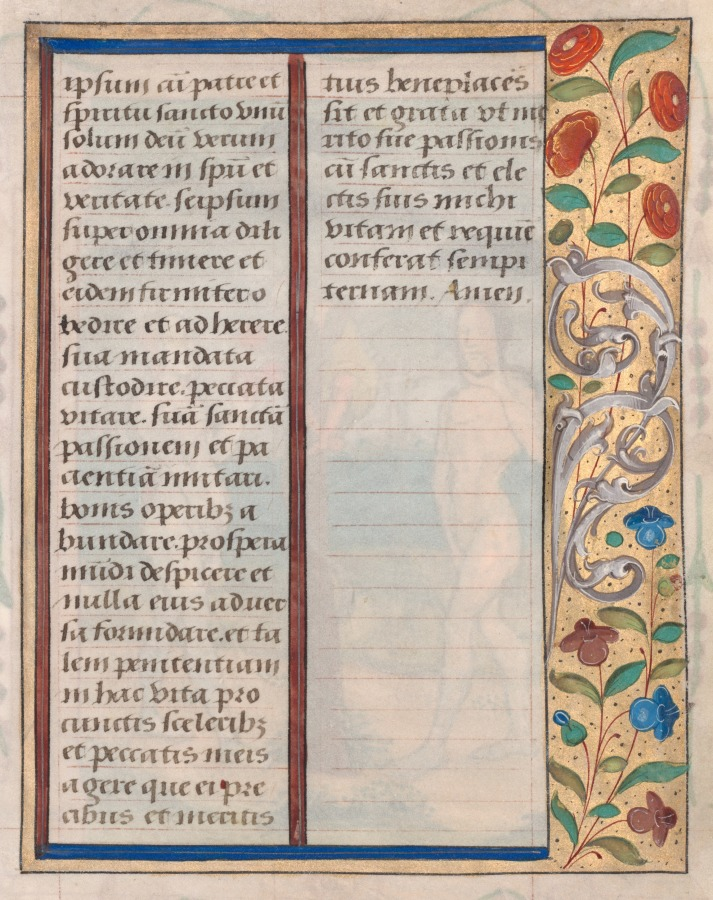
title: Leaf from a Book of Hours: Text with Illustrated Border (verso)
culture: France, Rouen, 16th century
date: c. 1510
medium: ink, tempera and liquid gold on vellum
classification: Manuscript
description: This leaf came from a highly customized and lavish book of hours made in Rouen, a major center for book production. Intended for a female patron, the original book, to which the museum owns three leaves, contained numerous illuminations and marginalia. The book was whole until the 1980s, when it was dismembered and the leaves sold separately. Other leaves from the same book are now in the Walters Art Museum in Baltimore, Maryland, and the Bodleian Library in Oxford, England. This leaf precedes the opening of the Hours of the Virgin and the traditional first scene of the Annunciation.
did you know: The heart of every book of hours is the Hours of the Virgin, a set of prayers in which the reader asked the Virgin Mary to intercede on their behalf.